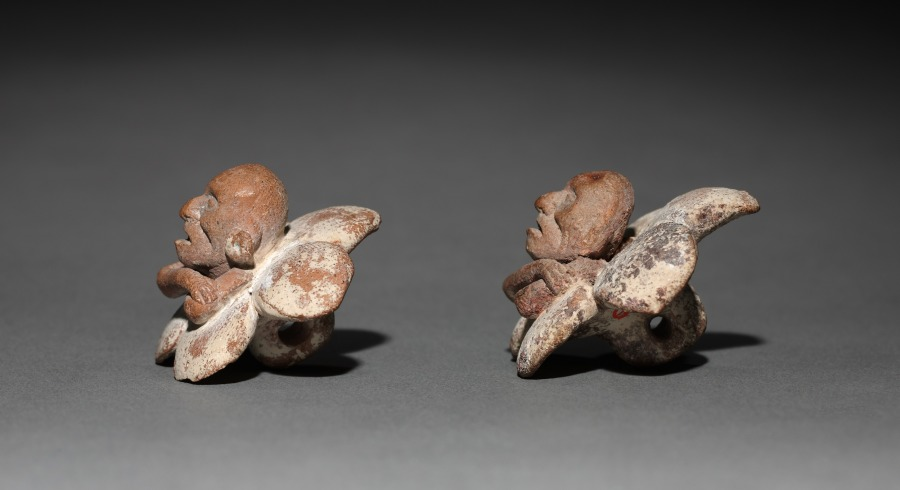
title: Pair of Figure in Flower Ornaments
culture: Mexico, Yucatán, Jaina Island region, Campeche, Maya style (250-900)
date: 500–900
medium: earthenware with slip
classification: Jewelry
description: Figures within flowers are one of the most enchanting themes of the Maya ceramic art of Jaina, an island off the western Yucatán coast. The figures, usually males who cross their arms over their bodies, are either radiantly youthful or aged (as here), suggesting a relationship to the life cycle.